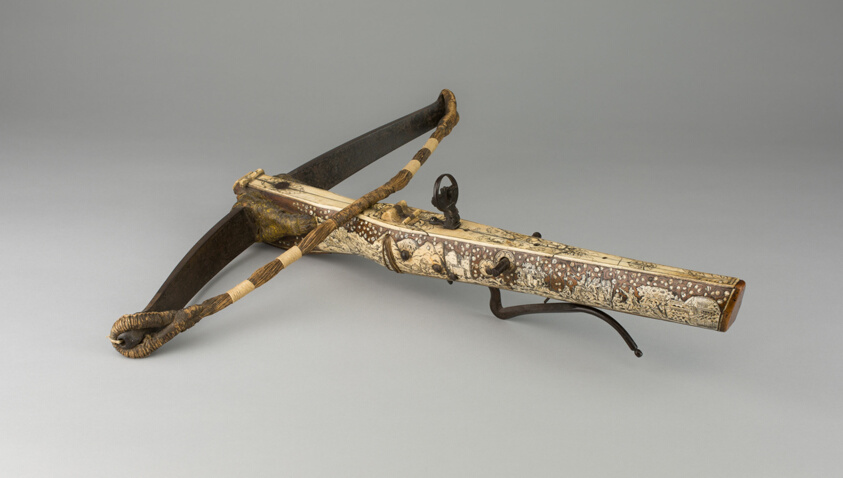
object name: Arms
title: Sporting or Target Crossbow for a Youth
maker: German or Swiss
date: late 16th century/early 17th century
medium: Steel, fruitwood, staghorn, and cord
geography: Germany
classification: crossbow; arms; arms and armor